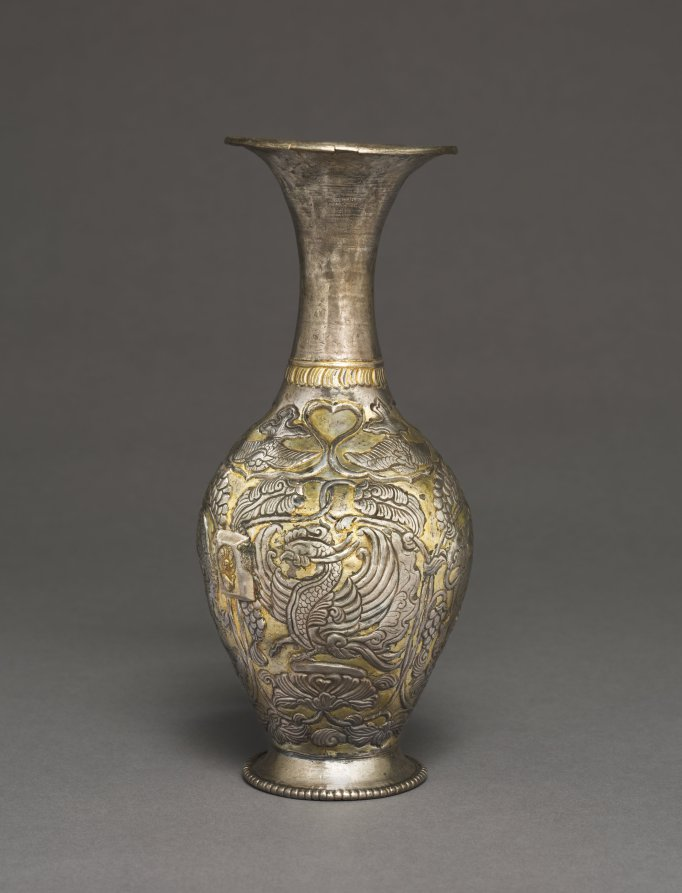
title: Vase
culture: Central Asia (Sogdiana) or Tibet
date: c. late 600s–early 700s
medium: silver with gilded foil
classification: Silver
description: Located amid the vast “silk roads” trade network, medieval Tibet was a place of dynamic cultural exchange. This decanter is evidence of such interactions. The vessel is part of the tableware used to hold wine during feasts. Tibetan elites adopted the tradition of consuming wine at social gatherings from their Iranian (Persian) contemporaries, whose wine banquets were lavish affairs with plentiful food and drink.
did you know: Lions were often seen as powerful protectors while phoenixes were associated with good fortune.